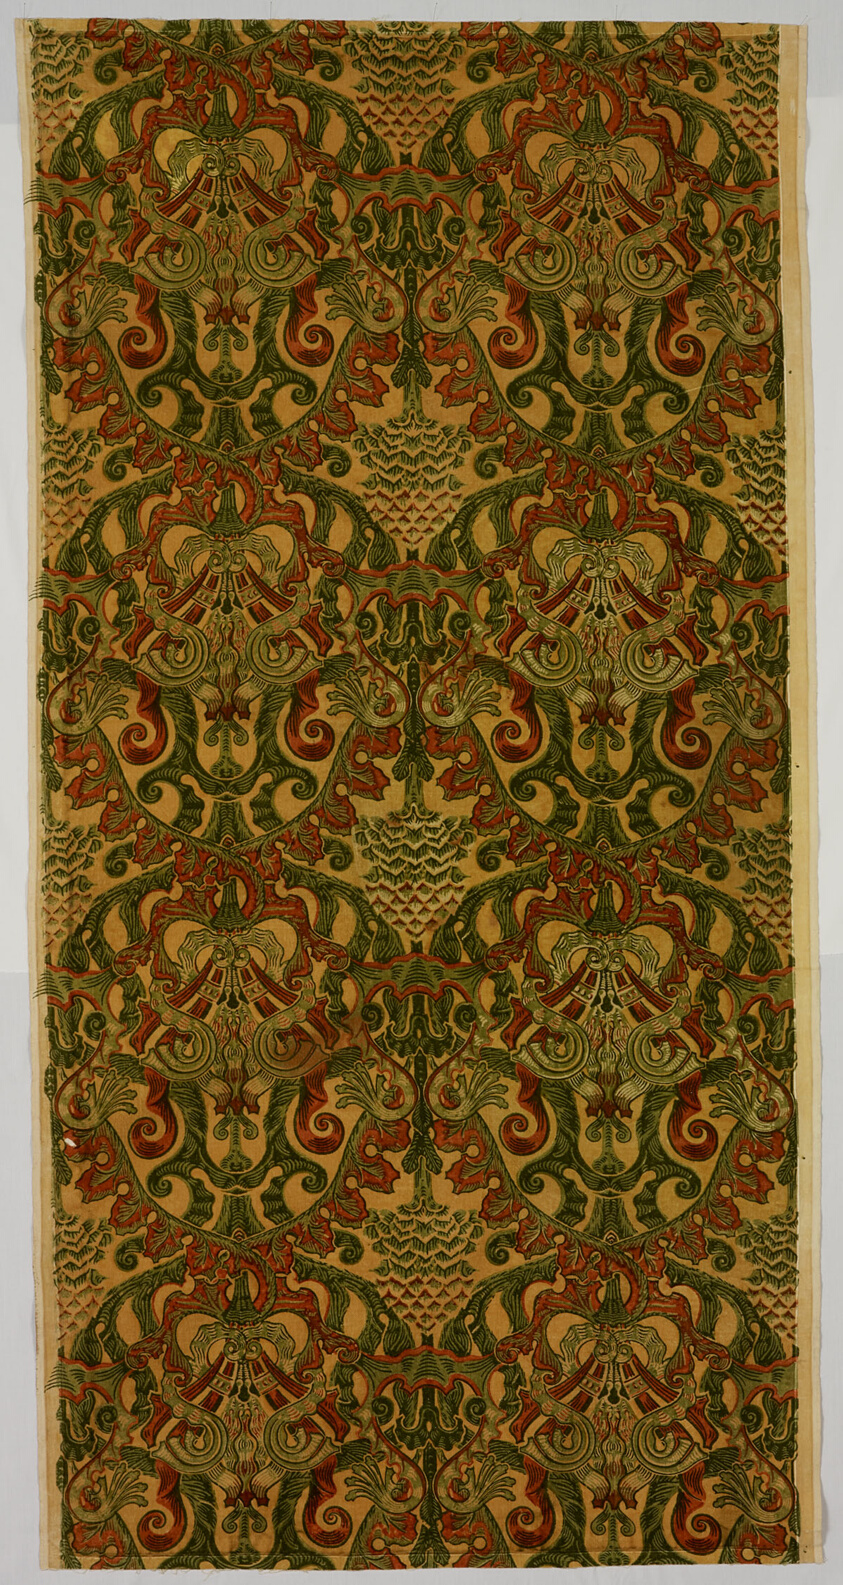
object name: Textile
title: Panel (Formerly Furnishing Textiles)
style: Arts and Crafts Movement, british, 19th century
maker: Designed by Lewis F. Day (English, 1845–1910); Produced by Turnbull & Stockdale, founded 1881; England, Ramsbottom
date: Late 1880s/early 1890s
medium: Cotton, twill weave with supplementary pile wefts forming cut, solid pile (velveteen); block printed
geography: England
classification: textile; weaving - printed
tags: Chicago